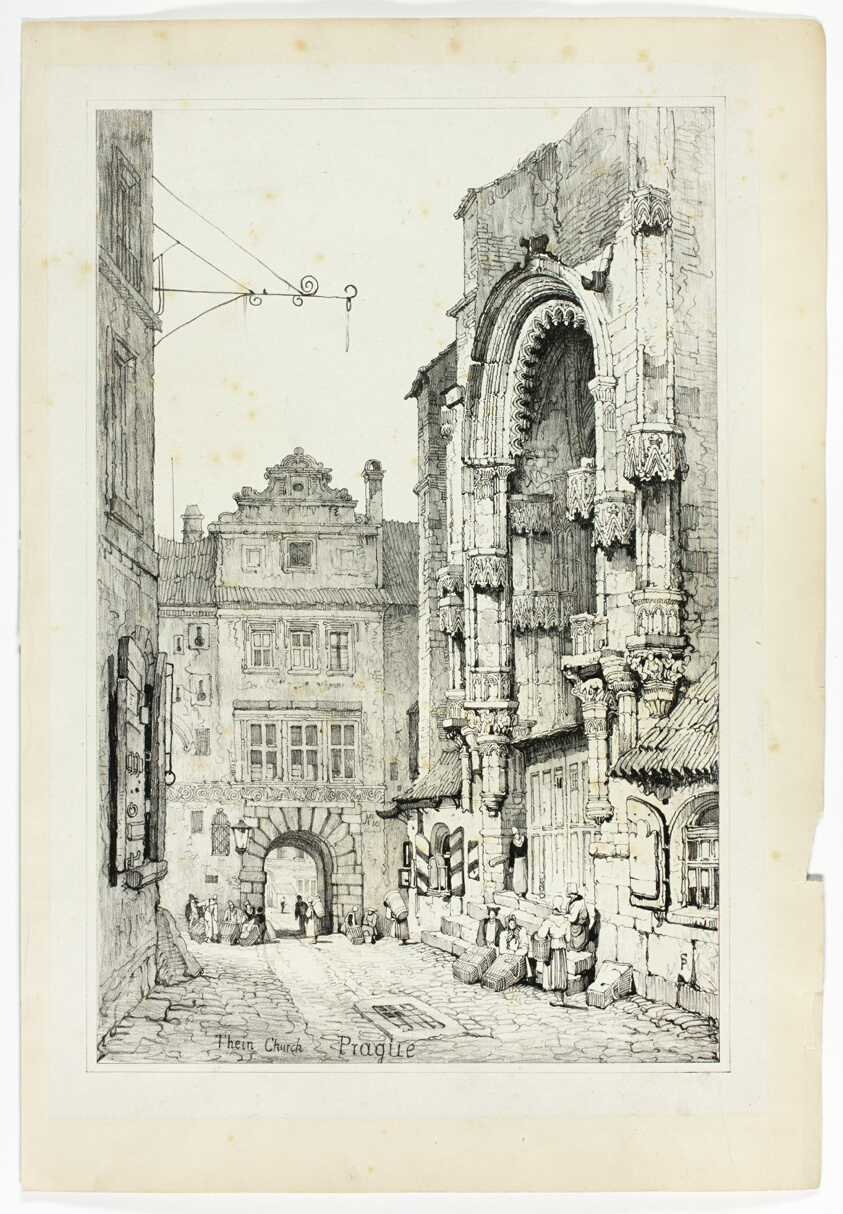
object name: Print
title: Thein Church, Pragrue, from Facsimiles of Sketches made in Flanders and Germany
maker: Samuel Prout (English, 1783-1852); printed by Charles Joseph Hullmandel (English, 1789-1850)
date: 1833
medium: Lithograph in black on grayish-ivory chine, laid down on ivory wove paper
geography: England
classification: lithograph; print; prints and drawing